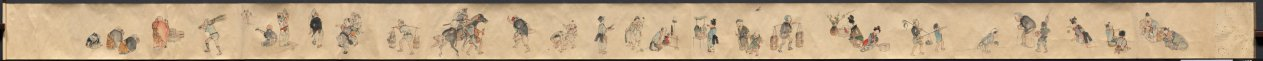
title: Festival Scenes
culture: Japan, Edo period (1615–1868)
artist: Suzuki Nanrei (Japanese, 1775–1844)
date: c. 1795–1844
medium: handscroll; ink and color on paper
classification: Painting